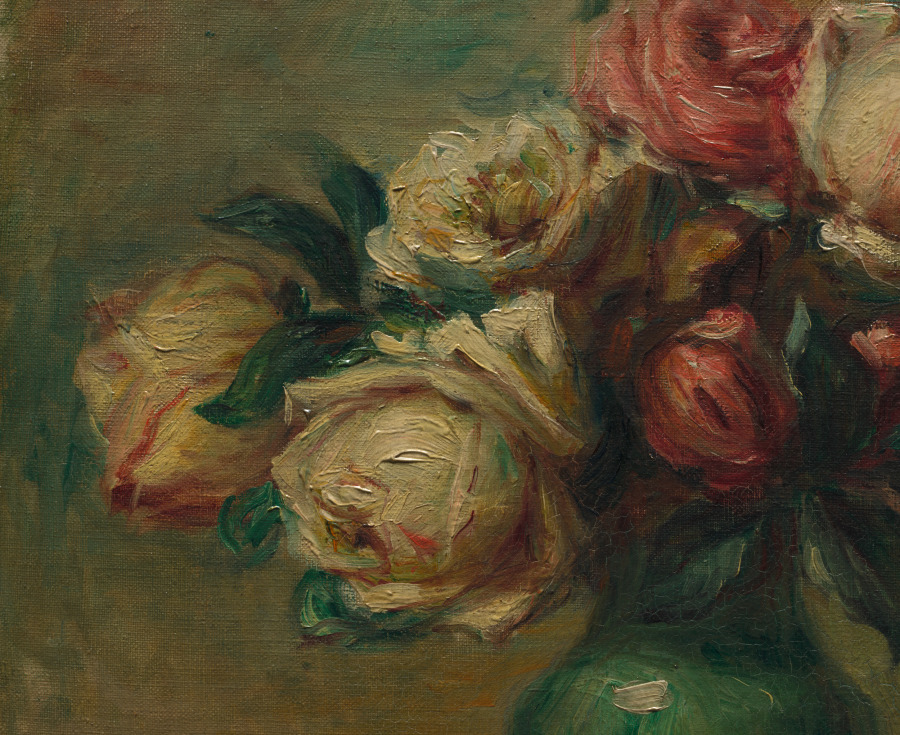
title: Roses in a Vase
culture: France, 19th century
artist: Pierre-Auguste Renoir (French, 1841–1919)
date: c. 1890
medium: oil on fabric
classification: Painting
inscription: Signed lower left: Renoir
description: The palette Renoir used to depict the seven roses in this still life ranges from various shades of red to warm whites, light yellows, and pinks. The artist declared, "'Painting flowers lets my brain rest. It does not cause the same tension of spirit as when I face a model. When I paint flowers, I put down tones, I boldly try values, without having to worry about losing a canvas.'" He was particularly fond of roses, whose full, rounded shapes he likened to the female body. In 1861, Renoir met Claude Monet (1840–1926) and later shared a studio with him. Monet became an important influence on Renoir's art, as can be seen here in the rapid brush strokes, thinly scuffled background, and buildup of paint (impasto) in the blooms.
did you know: Renoir was an excellent singer who wanted to be a musician, but for financial reasons left school at age thirteen to work as an apprentice painter in a porcelain factory.